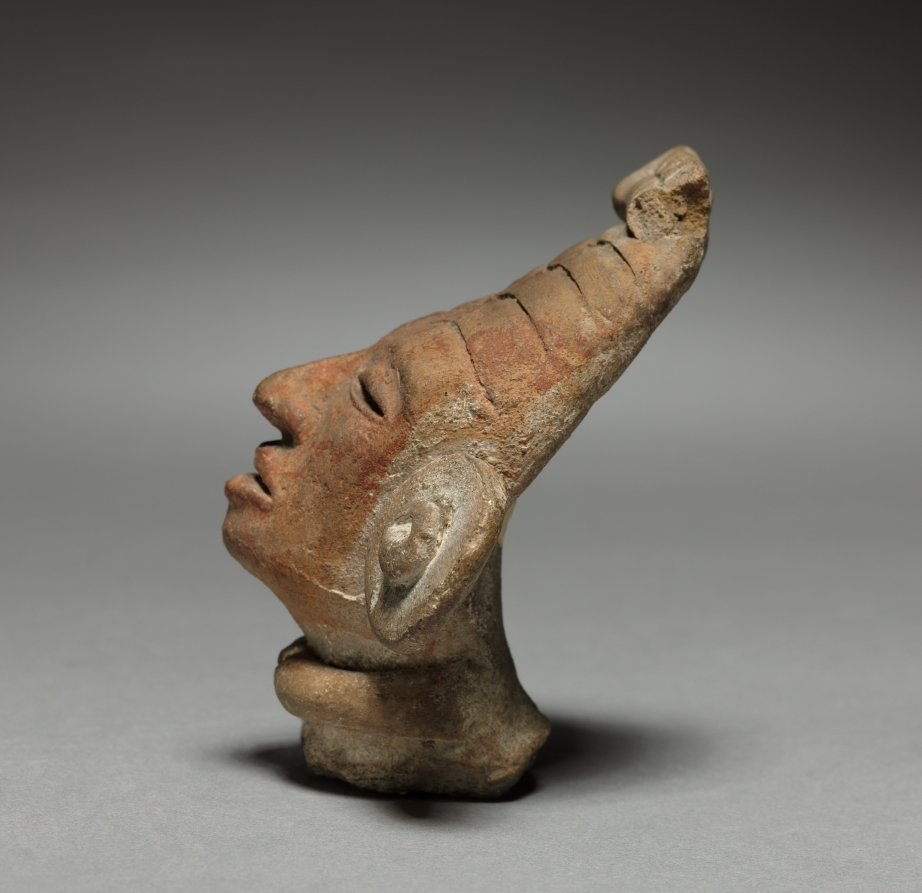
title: Figurine Head Fragment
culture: Central Mexico, Teotihuacán, Classic period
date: 150–350 CE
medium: ceramic, pigment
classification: Ceramic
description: The earliest Teotihuacan figurines are hand modeled, while later specimens were produced with molds. This exceptionally large example has a mold-made head, with facial features carefully retouched by hand. Earthenware figurines were made in great abundance throughout Teotihuacan's history, and may have been used in household religious rituals.